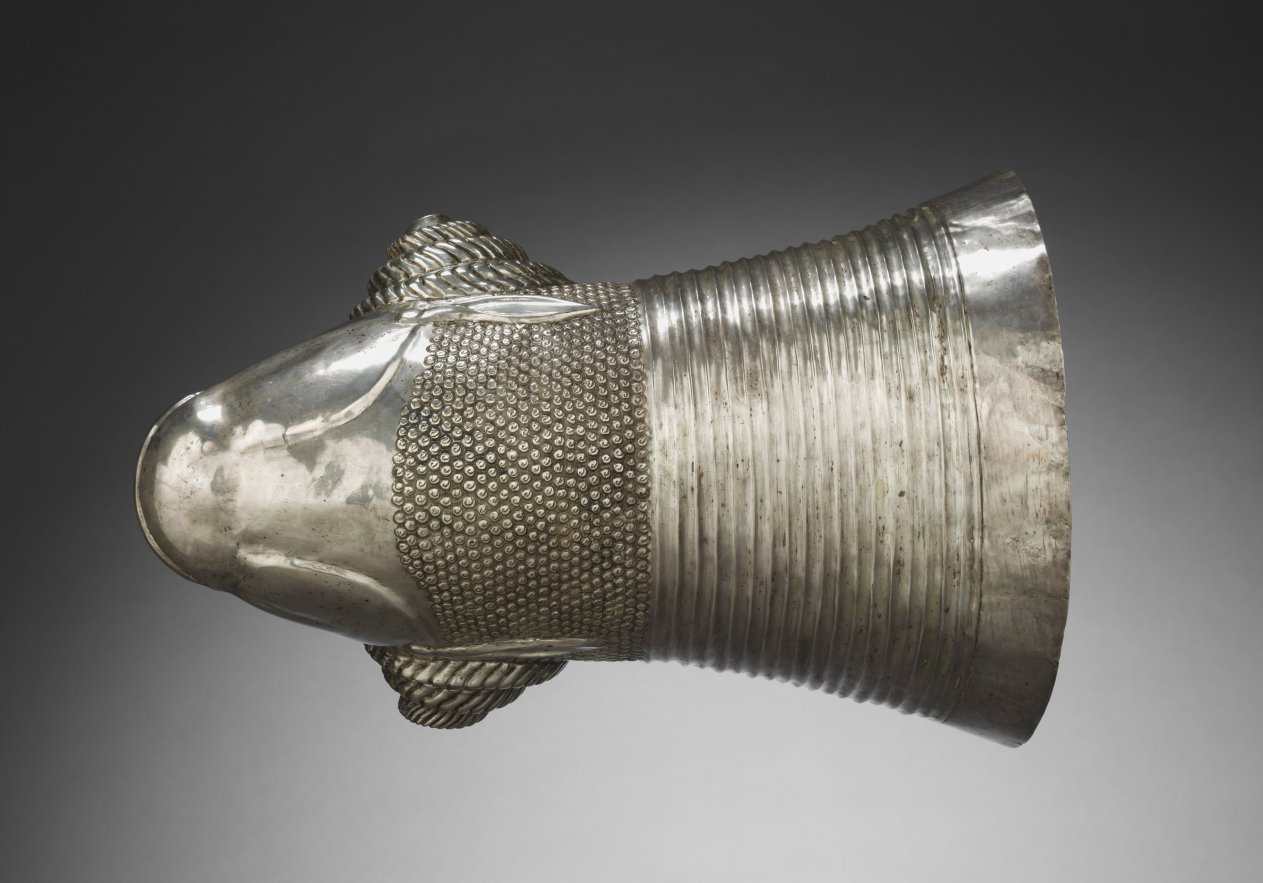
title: Ram-Head Drinking Vessel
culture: Iran, Median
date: c. 600 BCE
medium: silver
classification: Metalwork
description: The Medes, who conquered the Assyrians, were soon conquered by the Achaemenian Cyrus the Great, king of Persia from 559 to 529 BC. The rhyton, or horn-shaped drinking vessel, popular among the Medes, was adopted by the Achaemenians.